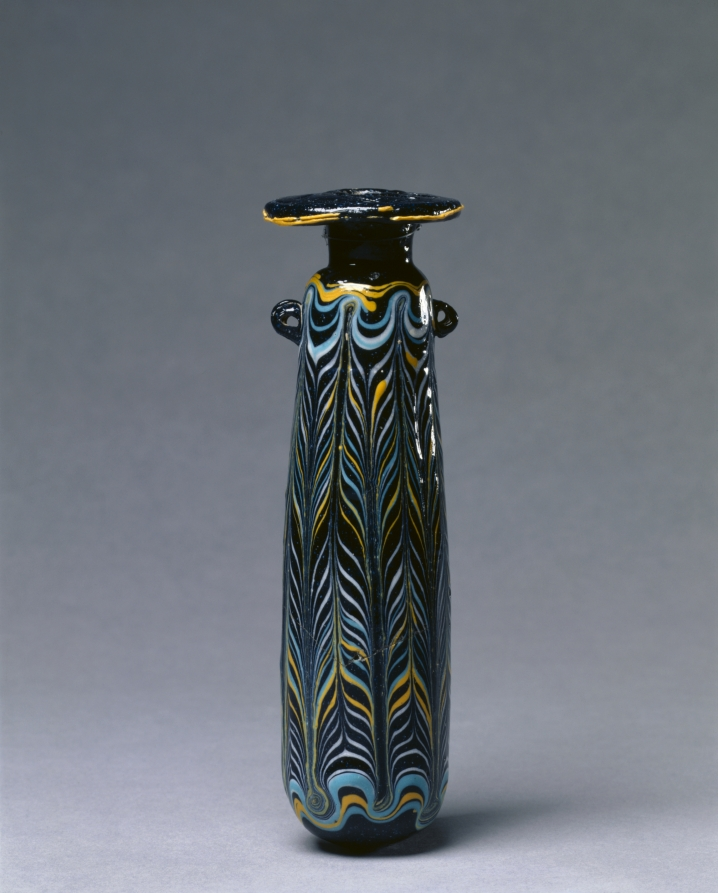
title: Perfume Bottle (Alabastron)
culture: Italy or Eastern Mediterranean, Etruscan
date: c. 325–275 BCE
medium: glass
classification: Glass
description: Before glassblowing was invented in about 50 BC, glass bottles were formed by winding molten glass around a mud or dung core much the way cotton candy is wrapped around a paper cone. Later, the core was scraped out leaving a hollow bottle to be filled with expensive perfumes or scented oils.